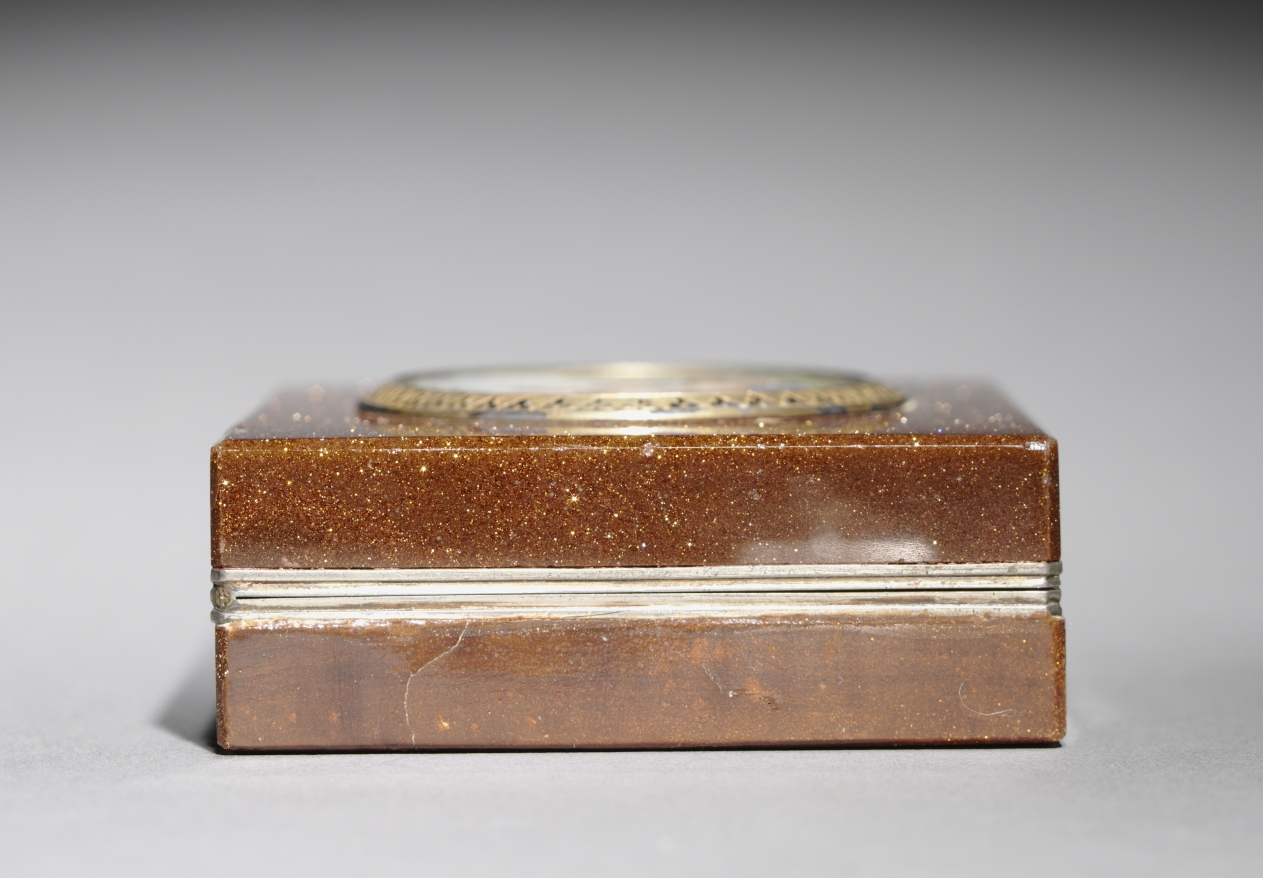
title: Snuff Box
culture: Italy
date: 1860–70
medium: goldstone, gold, micro mosaic glass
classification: Enamel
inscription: no marks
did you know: Hundreds of small glass tesserae make up the central image on the cover of this snuff box.